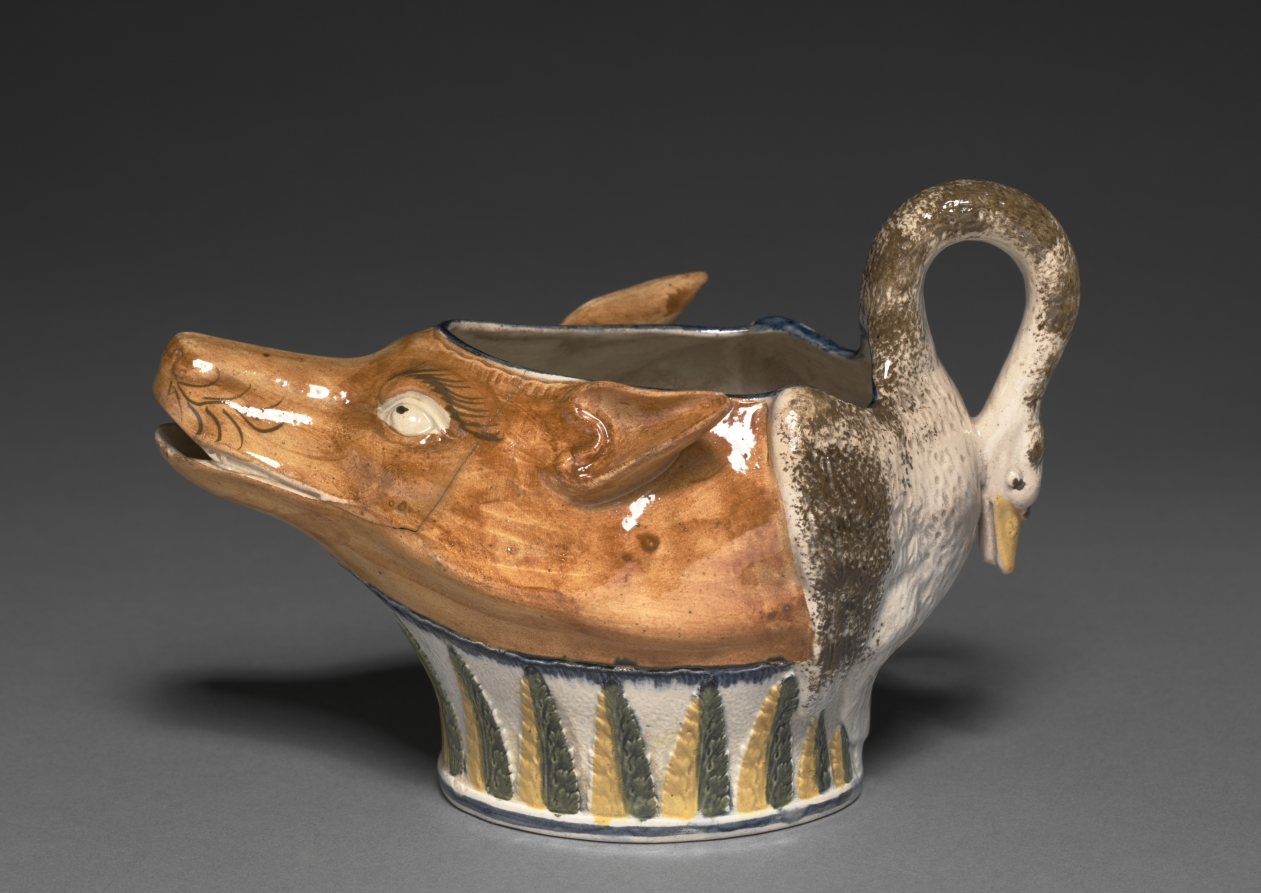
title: Fox and Swan Creamer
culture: England, Staffordshire, 18th century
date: c. 1800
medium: earthenware (Pratt ware)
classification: Ceramic